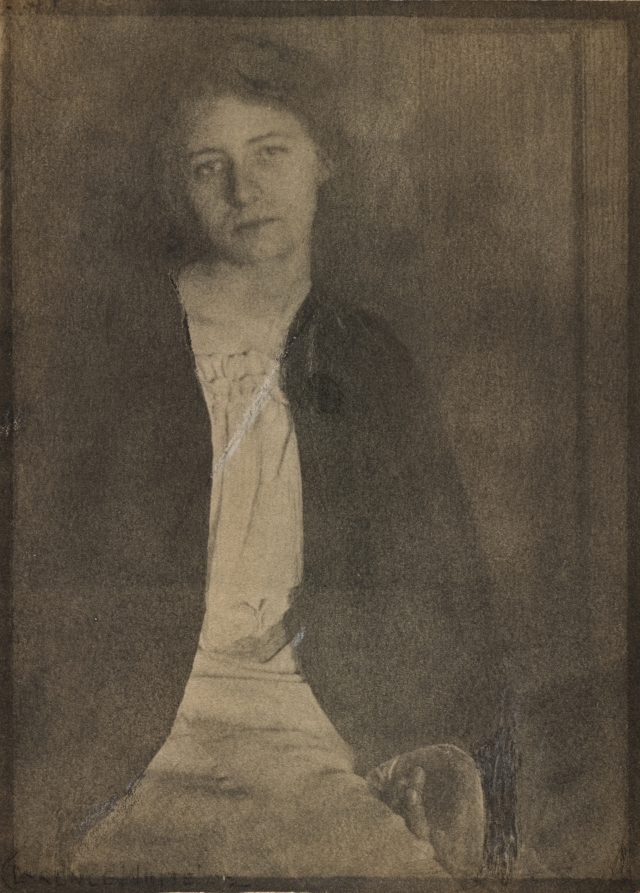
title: Julia Hall McCune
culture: America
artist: Clarence H. White (American, 1871–1925)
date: 1902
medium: platinum print with pencil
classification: Photograph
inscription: Written in pencil on recto of photograph: "Clarence White [signed] '02"